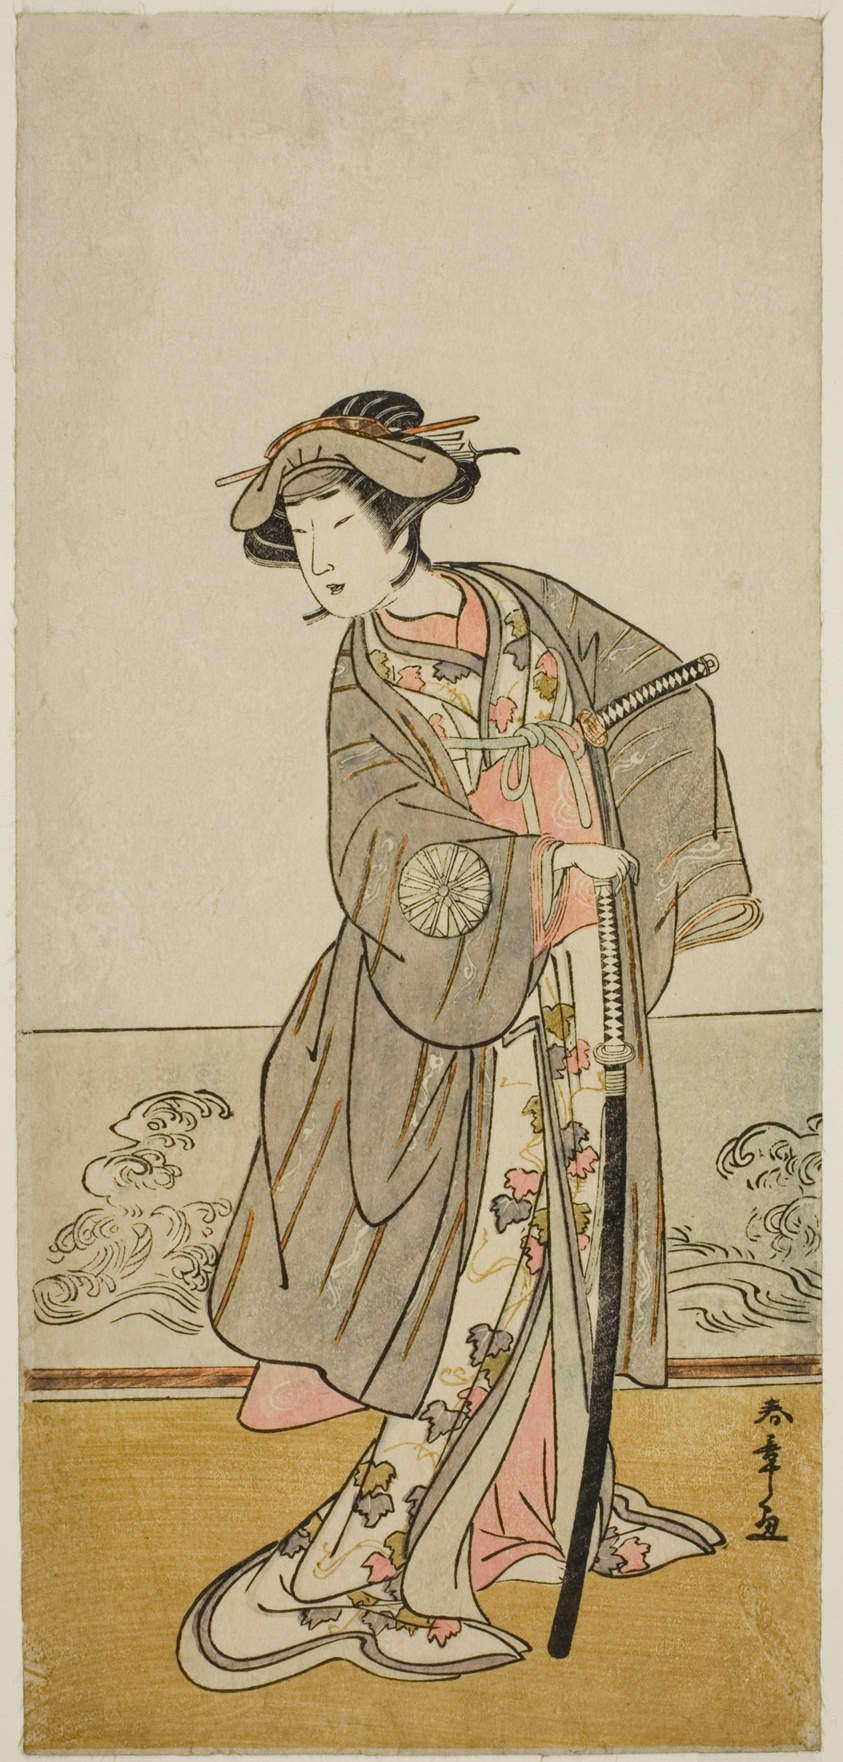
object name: Print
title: The Actor Nakamura Tomijuro I as Lady Hangaku (Hangaku Gozen) in the Play Wada-gassen Onna Maizuru, Performed at the Nakamura Theater in the Seventh Month, 1777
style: Japanese (culture or style)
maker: Katsukawa Shunsho 勝川 春章; Japanese, 1726-1792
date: c. 1777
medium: Color woodblock print; hosoban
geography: Japan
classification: woodblock print; print; asian art